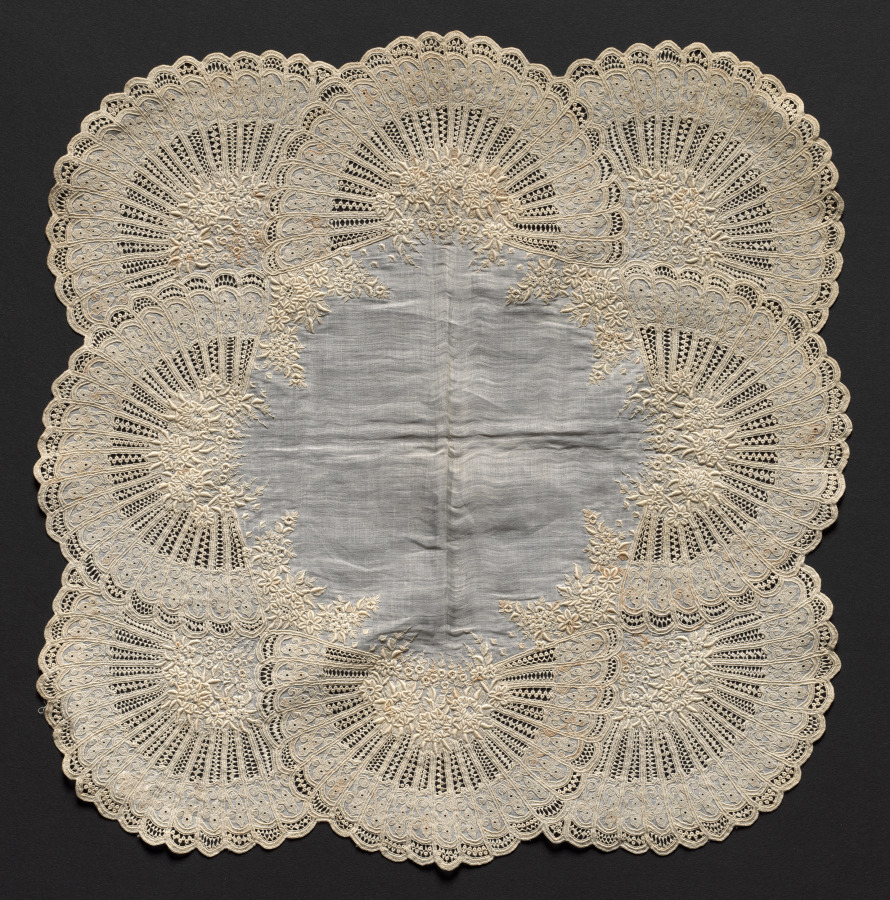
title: Embroidered Handkerchief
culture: Switzerland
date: 1850–99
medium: Plain weave linen with embroidery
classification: Embroidery